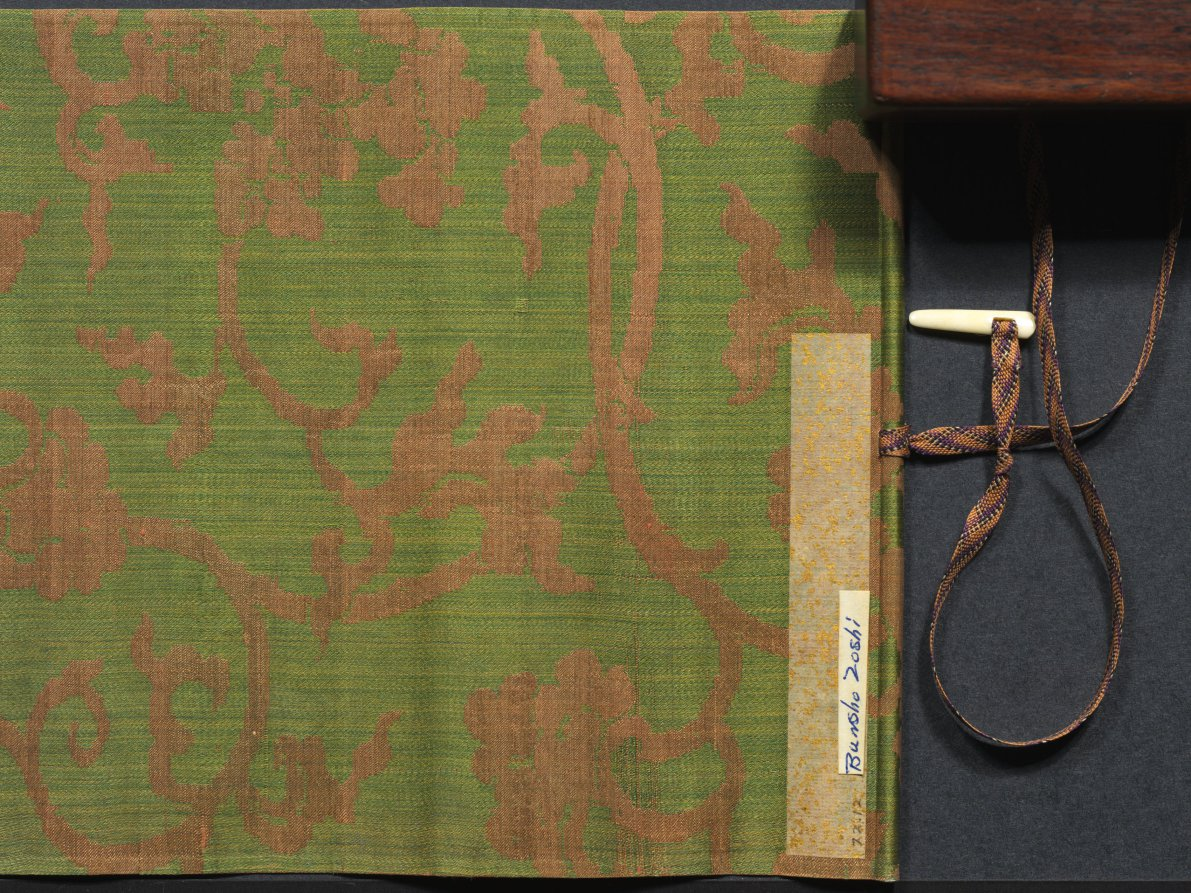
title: The Saltmaker's Story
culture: Japan, Edo period (1615–1868)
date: early 1600s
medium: One of a pair of handscrolls; ink, color, and gold on paper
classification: Painting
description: Once read and copied by girls at New Year’s celebrations and included in dowries, The Saltmaker’s Story is a rags-to-riches tale in which daughters are gifts from the gods. Despite his simple outlook, the main character progresses from humble roots as an associate at Kashima Shrine to the elite status of grandfather of the emperor through the intervention of the Kashima deity. The Saltmaker’s Story is traditionally presented in a set of three scrolls, but the text of this set has been removed by a previous owner, who remounted the illustrations as a pair. The paintings of this one take us from right to left through the first half of the tale.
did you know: This handscroll originally had texts before its paintings, but the texts were removed.